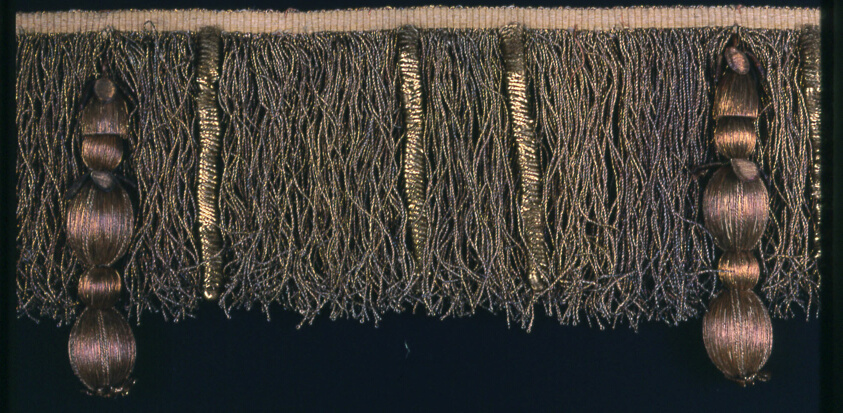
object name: Textile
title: Fringe with Tassels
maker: France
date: 1710/74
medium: Cotton and gold gilt strip wound around a linen fiber core, warp-faced plain weave with extended weft loop fringe; tassels attached: gold gilt coiled wire and wood forms wrapped with gold gilt strips wrapped around a linen core and cardboard forms covered with gold gilt strips and gild gilt wires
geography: France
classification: textile; weaving